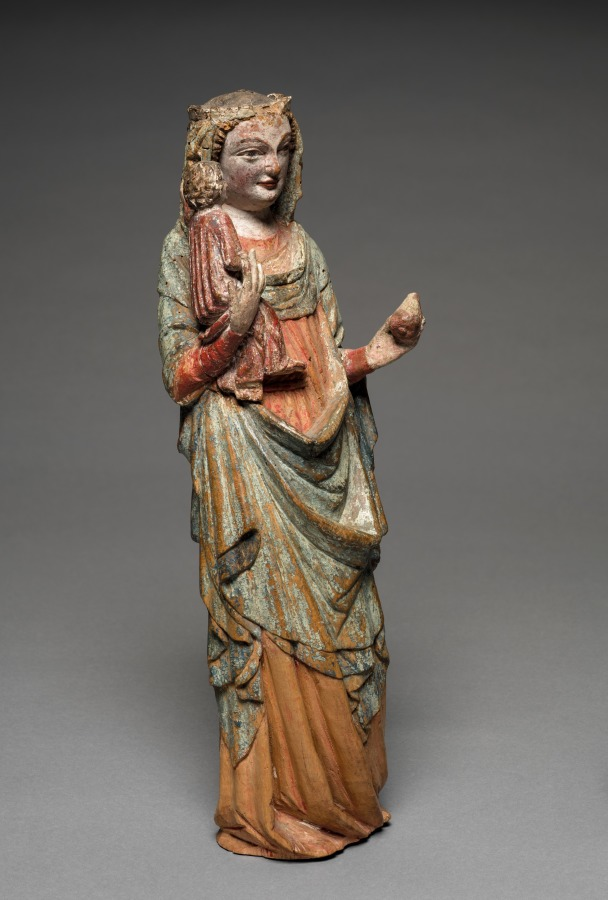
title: Reliquary Statuette of the Virgin and Child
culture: Austria, Salzburg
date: c. 1330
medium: painted lindenwood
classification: Sculpture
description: A small rectangular cavity in the back of this sculpture reveals that it was originally made to serve as a reliquary (a container for relics). In her left hand the Virgin holds a pear, a symbol of the peace and love of Christ.